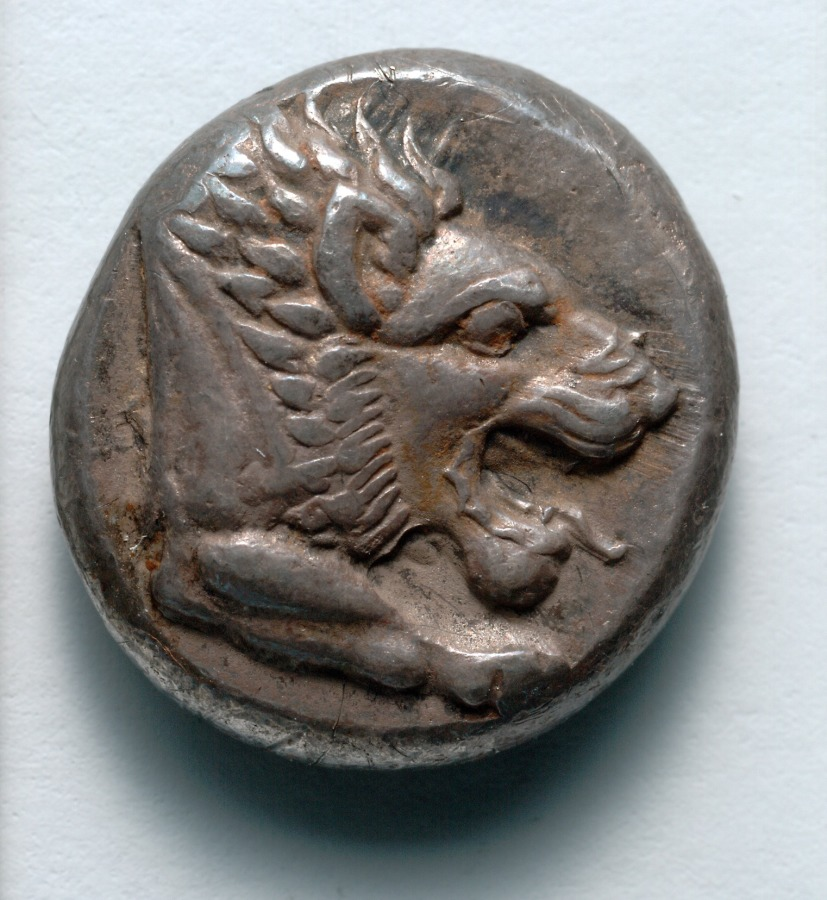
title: Drachm: Forepart of Lion (obverse); Head of Aphrodite (reverse)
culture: Greek, minted at Knidos (Karia)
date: 465–449 BCE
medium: silver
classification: Coins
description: The lion, king of the beasts and an animal associated with regal and heroic power, featured prominently on the coinage of many ancient Greek city-states. Artists placed the lion in a variety of poses, sometimes including the whole body, at other times the foreparts or just the head. Although it may once have roamed nearby, for many Greeks the lion was a monster nearly as exotic as the Chimaera, of which it formed a part, together with a goat head and snake-headed tail.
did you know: The forepart of a lion on Knidian coins is thought to represent Apollo.